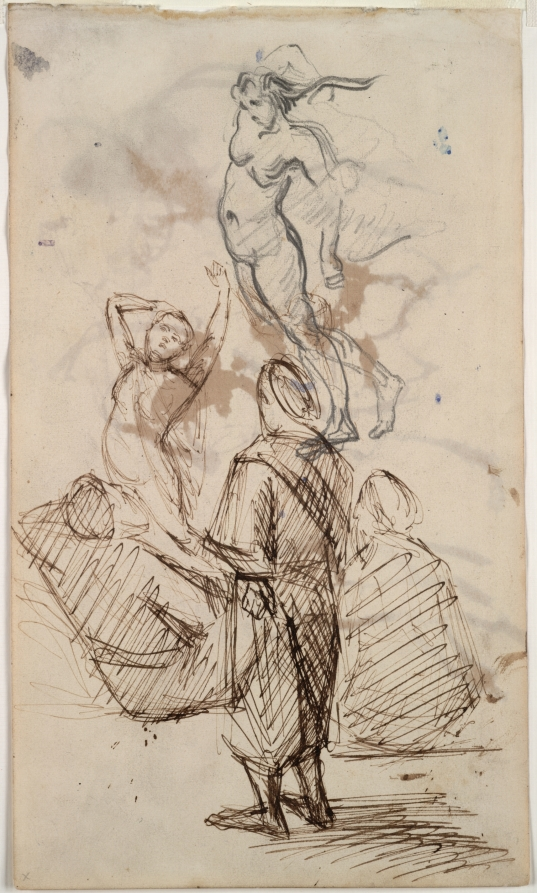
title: Sheet of Studies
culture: France, 19th century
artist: Paul Cezanne (French, 1839–1906)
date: 1871–76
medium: graphite and pen and brown ink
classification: Drawing